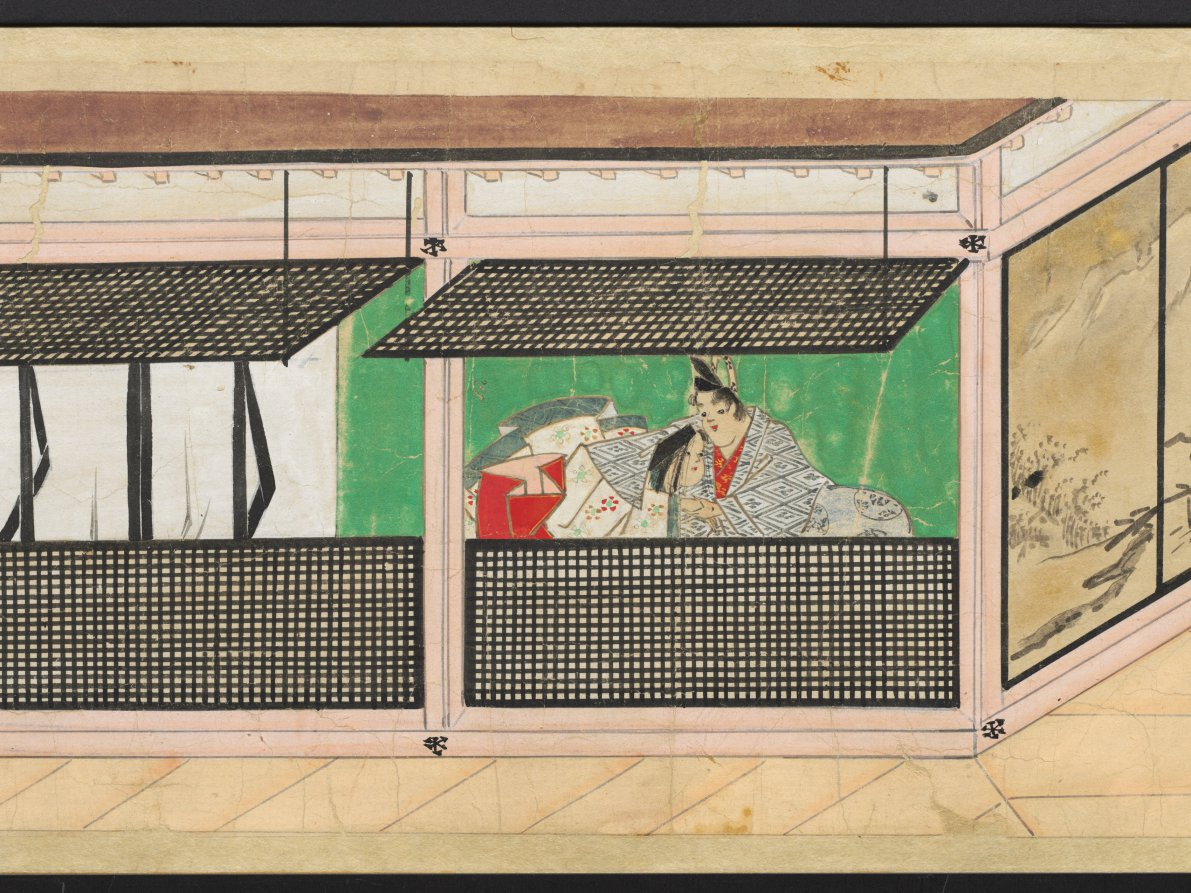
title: The Saltmaker's Story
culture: Japan, Edo period (1615–1868)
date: early 1600s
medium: One of a pair of handscrolls; ink, color, and gold on paper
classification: Painting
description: Once read and copied by girls at New Year’s celebrations and included in dowries, The Saltmaker’s Story is a rags-to-riches tale in which daughters are gifts from the gods. Despite his simple outlook, the main character progresses from humble roots as an associate at Kashima Shrine to the elite status of grandfather of the emperor through the intervention of the Kashima deity. The Saltmaker’s Story is traditionally presented in a set of three scrolls, but the text of this set has been removed by a previous owner, who remounted the illustrations as a pair. The paintings of this one take us from right to left through the second half of the tale.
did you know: This handscroll originally had texts before its paintings, but the texts were removed.